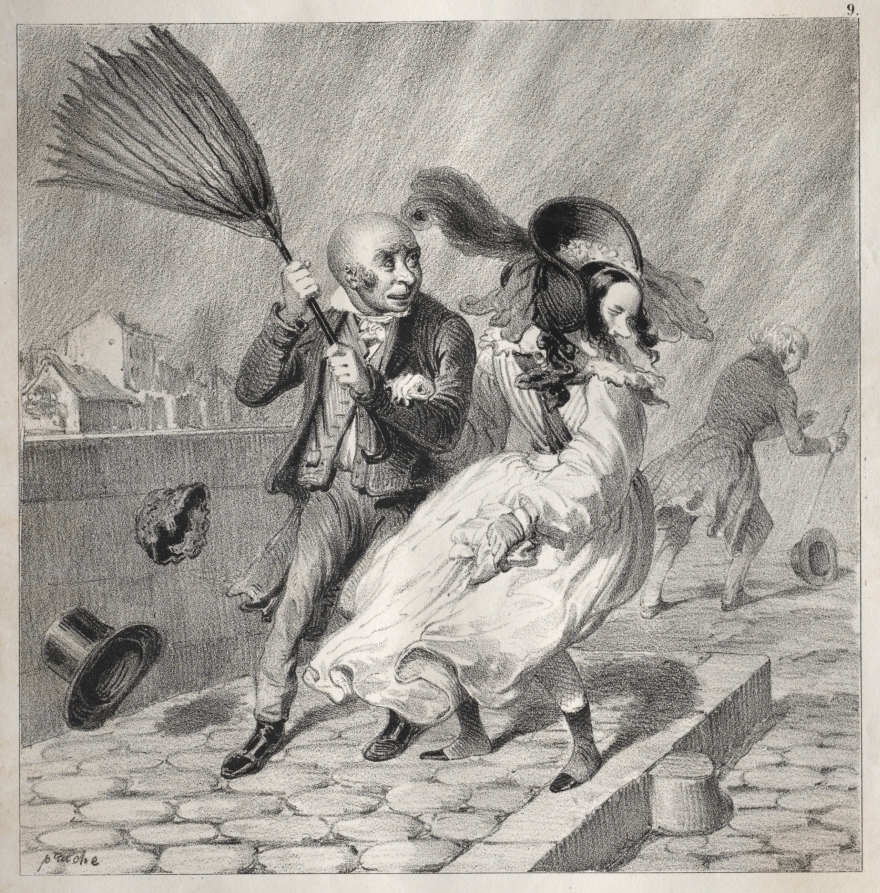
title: Bambochades: Vois-tu que mon baromêtre est au beau!...c'est un riche temps pour les biens de la terre!!!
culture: France, 19th century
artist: Clémente Pruche (French, 1831–1870)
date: 1841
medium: lithograph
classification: Print